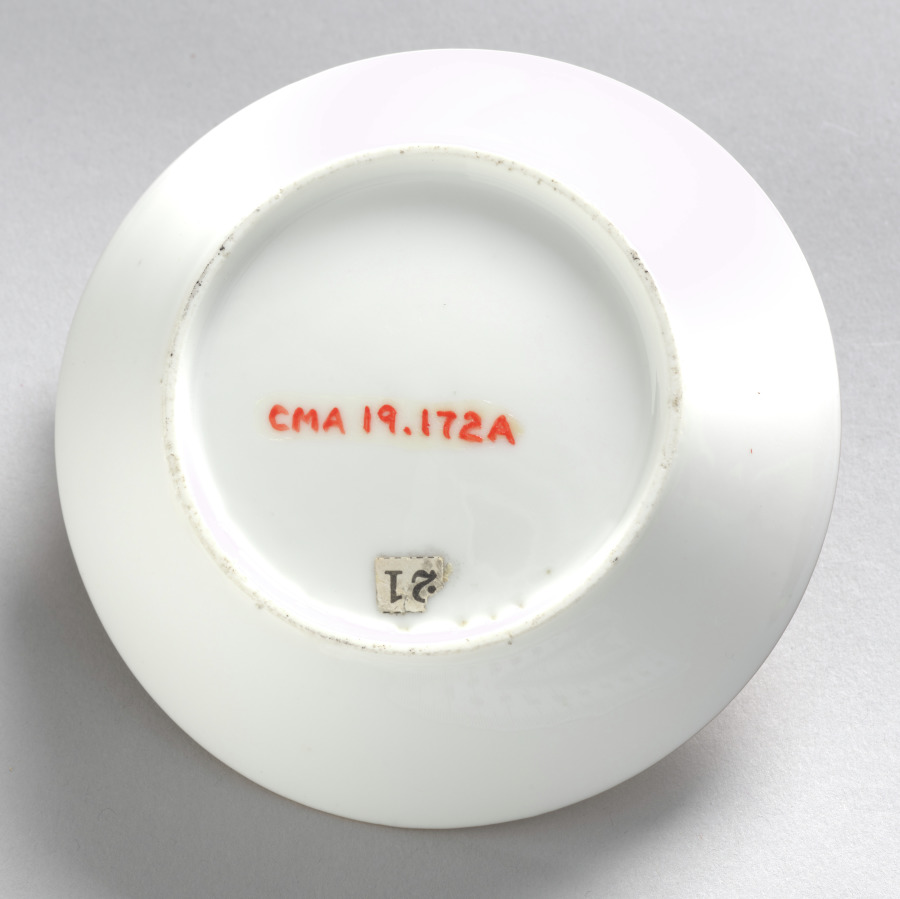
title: Saucer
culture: France, 19th century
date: c. 1800–1810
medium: porcelain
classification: Ceramic